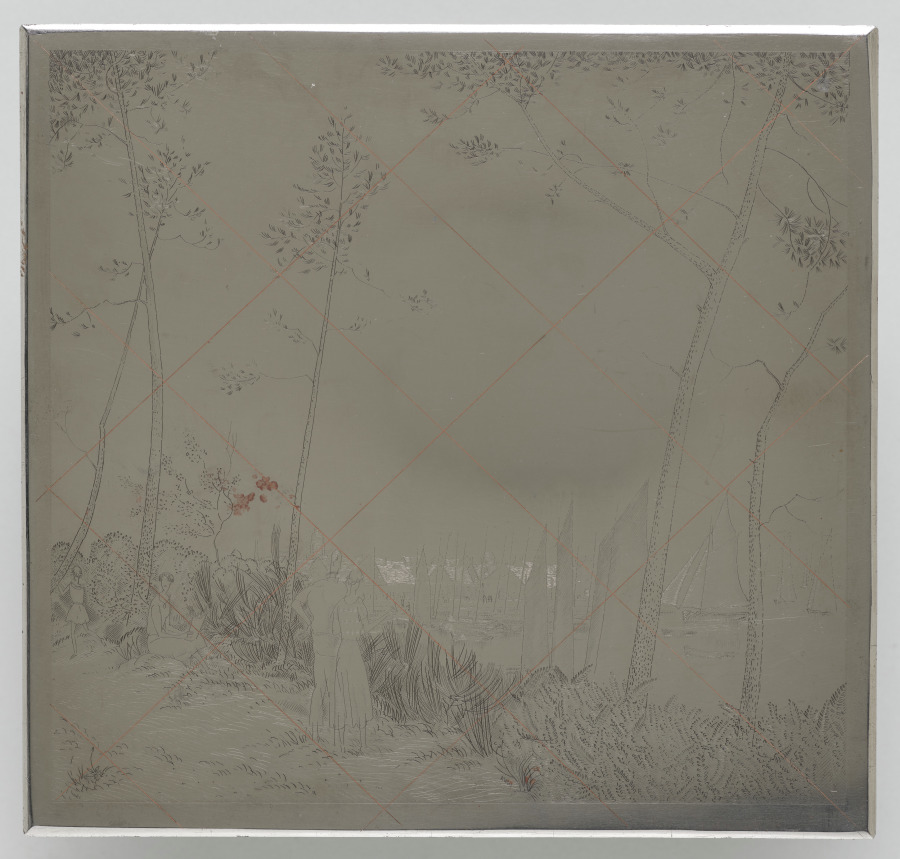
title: La Promenade sur le Port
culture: France, 20th century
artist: Jean-Émile Laboureur (French, 1877–1943)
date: 1935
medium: cancelled copper plate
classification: Plate